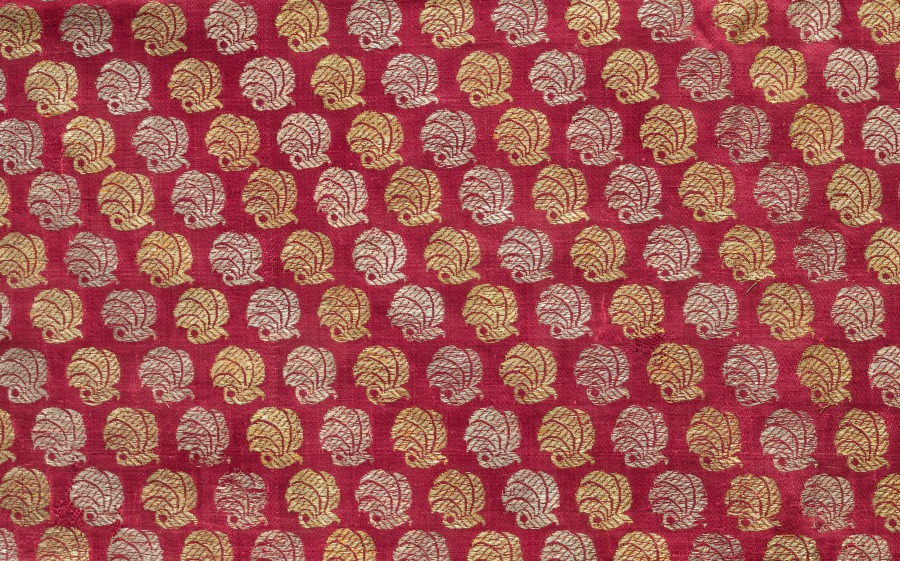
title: Fragment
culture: India, Benares ?, 19th century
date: 1800s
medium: brocade; silk, gold and silver threads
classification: Textile